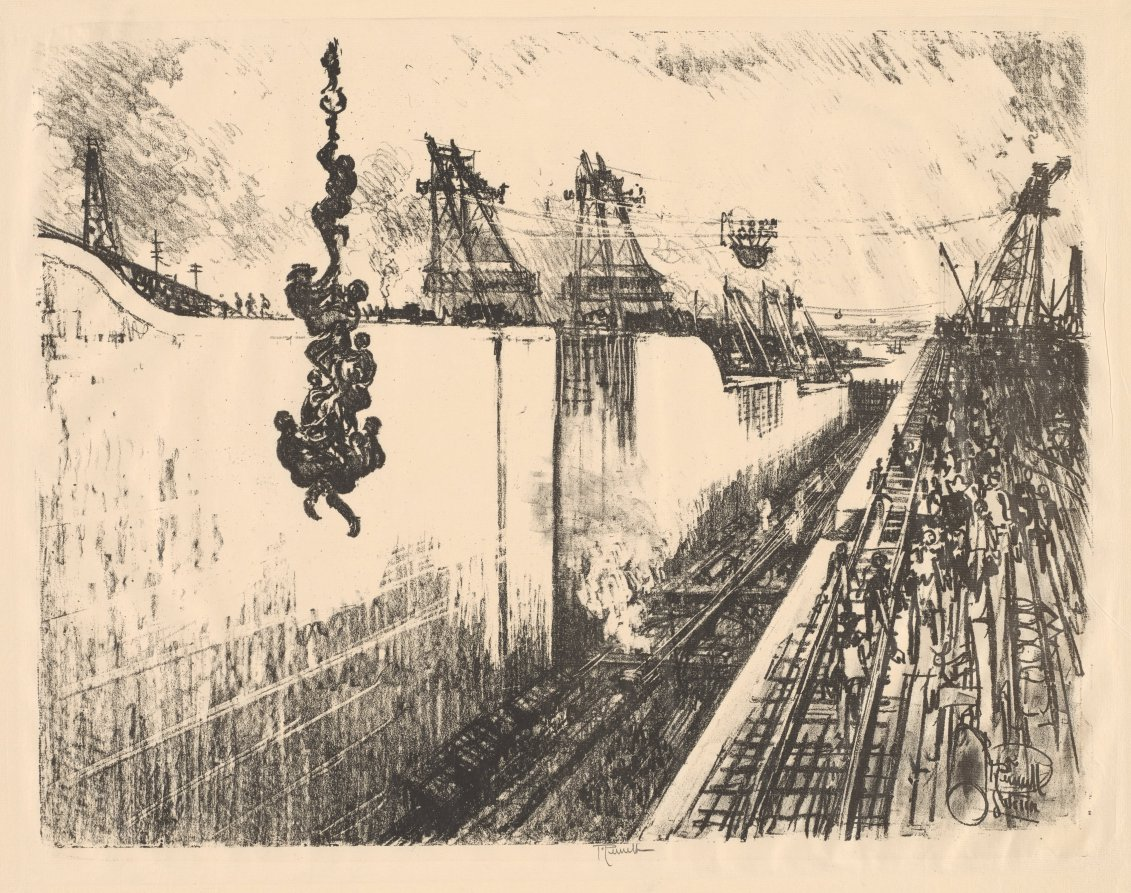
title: Dinner Time, Gatun Lock, Panama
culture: America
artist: Joseph Pennell (American, 1857–1926)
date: 1912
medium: lithograph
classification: Print